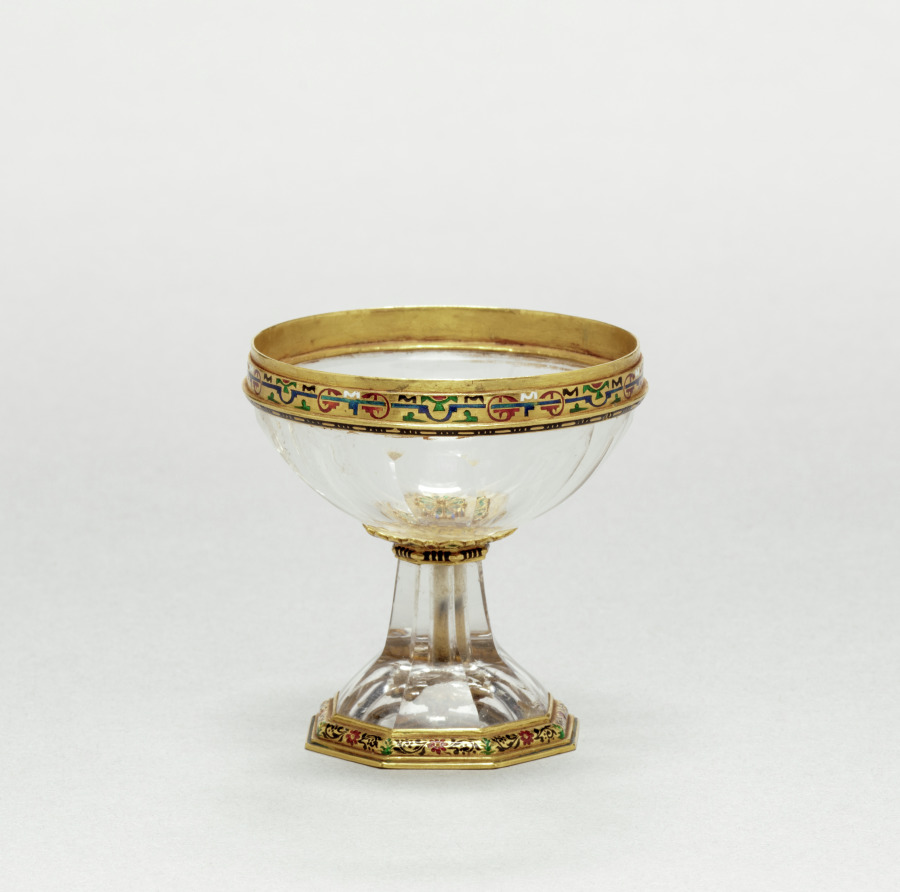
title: Double Cup (Lower Cup)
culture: Italy, late 16th century (possibly 19th century forgery, or 16th and 19th century pastiche)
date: late 16th century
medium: rock crystal set in enameled gold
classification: Enamel